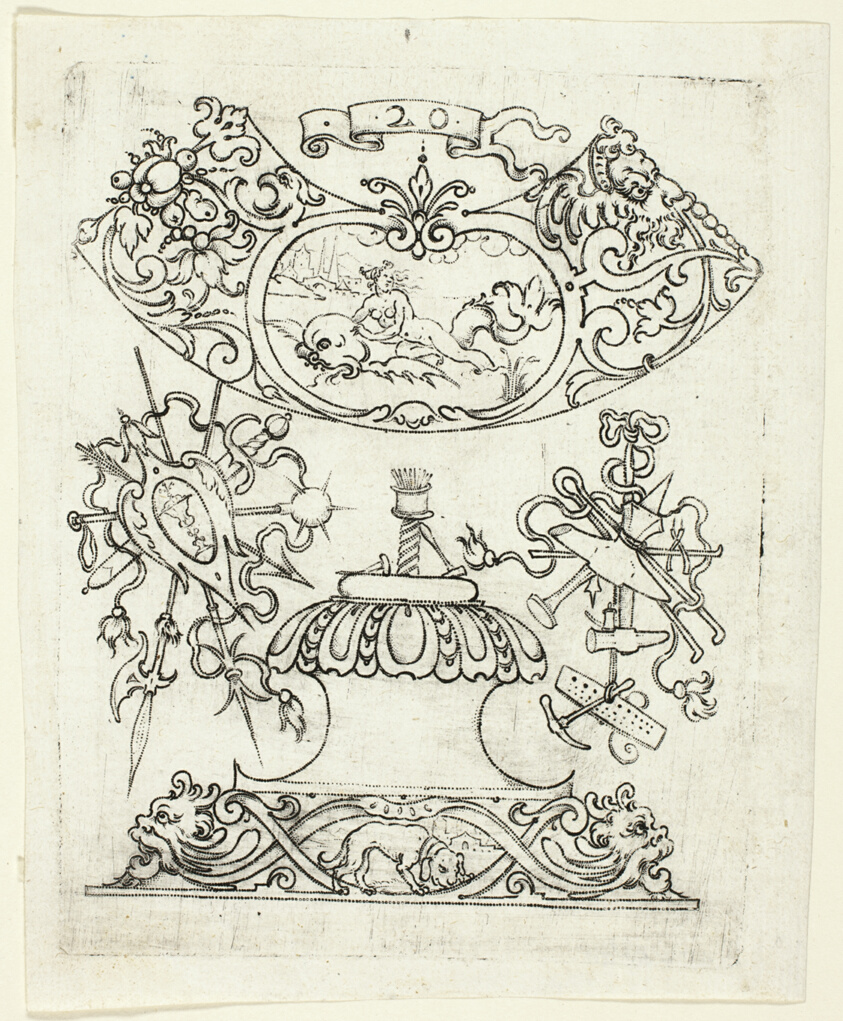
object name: Print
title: Plate 20, from twenty ornamental designs for goblets and beakers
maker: Master A.P. (German, active early 17th century)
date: 1604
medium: Punch engraving in black on ivory laid paper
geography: Germany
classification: engraving; print; prints and drawing